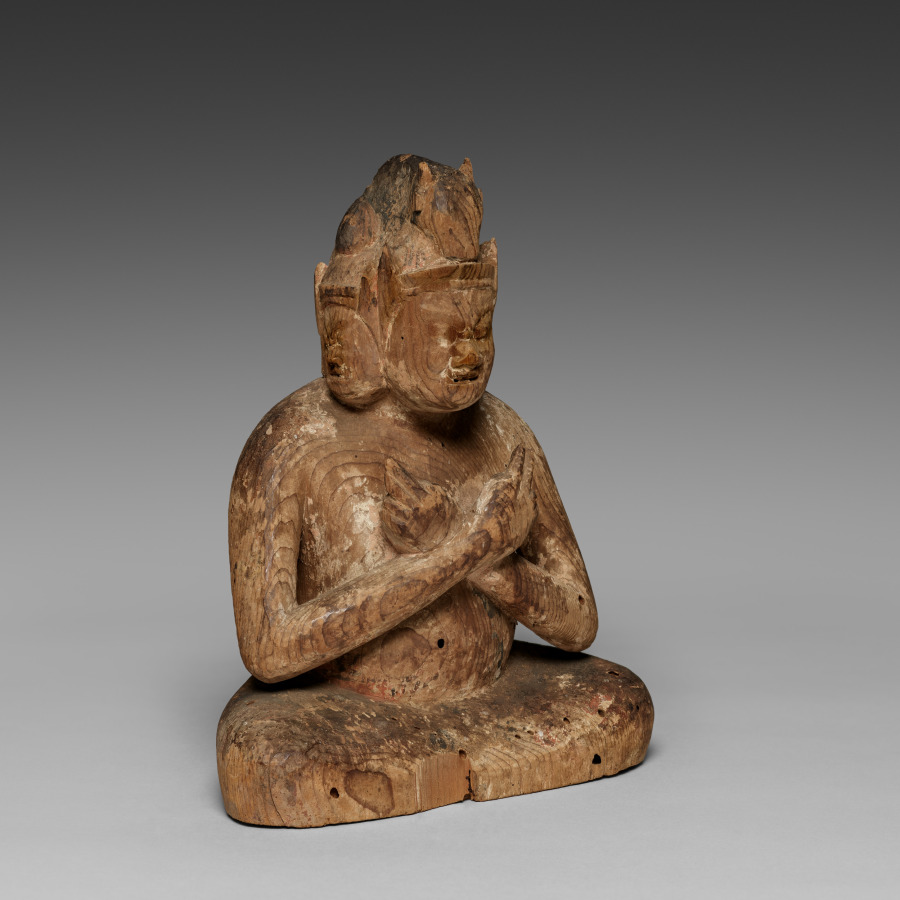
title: Gozu Tennō (Ox-Headed Plague Deity)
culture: Japan, Heian period (794–1185)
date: 1100s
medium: Wood with traces of color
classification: Sculpture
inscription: Object has wood storage box made and inscribed by former owner, sculptor Hirakushi Denchū (1872–1979). Inscription on face of box lid reads: Gozu Tennō sonzō (sculpture of Gozu Tennō [Ox-Headed Deity of Plague] 牛頭天王尊像); inscription on inside of box lid reads: made in the latter part of the Heian period, respectfully inscribed by Hirakushi Denchū [age] 99, February 1970 (平安朝後期作昭和四十五年二月 九十九 平櫛田中 拝題）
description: Gozu Tennō is a deity who is capable of both bringing epidemics and dispelling them. His name is literally “Ox-Headed Celestial King.” He usually has three heads with an ox-head rising above his primary face. He sometimes holds a lasso and sword or an ax, but here holds his hands in a powerful gesture that may be designed to repel illness or promote healing.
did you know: The Gion Festival in Kyoto is related to belief in Gozu Tennō.